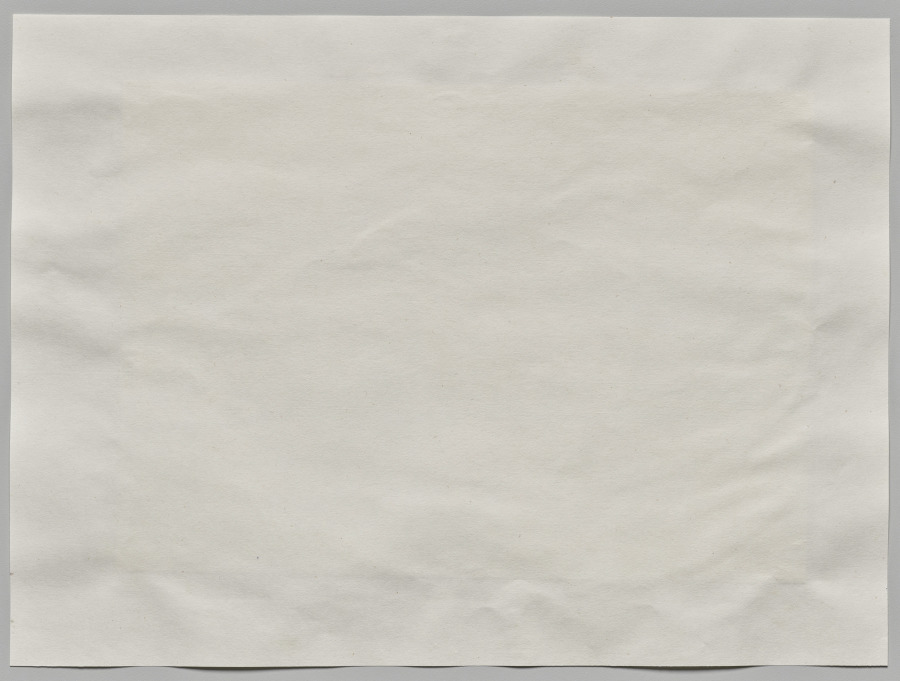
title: Untitled (View on the Praya, looking east, Hong Kong)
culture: England, 19th century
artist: William Pryor Floyd (British, 1834–c. 1900)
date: 1866–73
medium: albumen print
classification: Photograph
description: Floyd’s views of Hong Kong possess a clarity of organization and elegance lacking in most of his competitors’ photographs. The row of white, Western-style commercial buildings divides the composition horizontally into thirds. In the foreground are water and a single Chinese boat that leads the eye to the closest building. The crisp cubic forms of the buildings stand out against the uniformly dark hillside that serves as their backdrop.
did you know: Praya, a term used in colonial Hong Kong for the road by the waterfront, came from the Portuguese word praia, which means "beach."